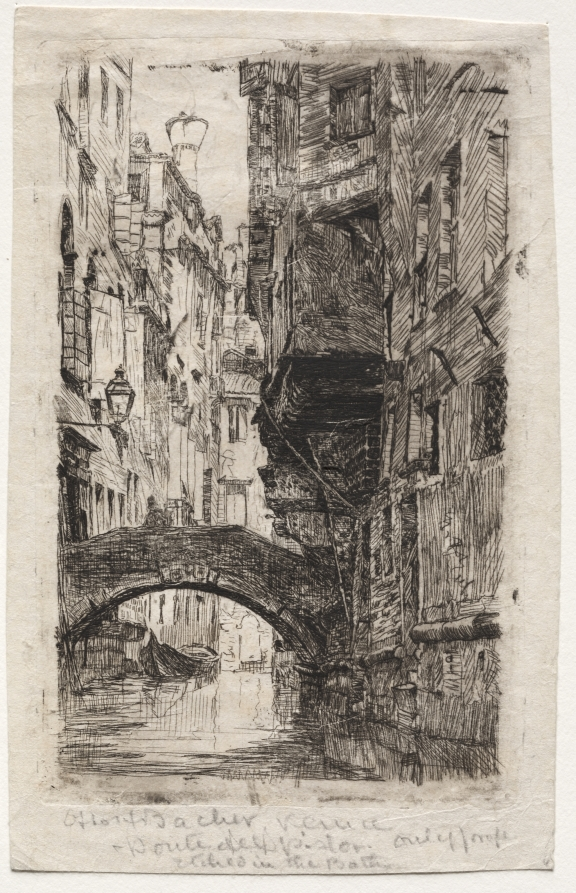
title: Ponte del Pistor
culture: America, late 19th-early 20th century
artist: Otto H. Bacher (American, 1856–1909)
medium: etching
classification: Print